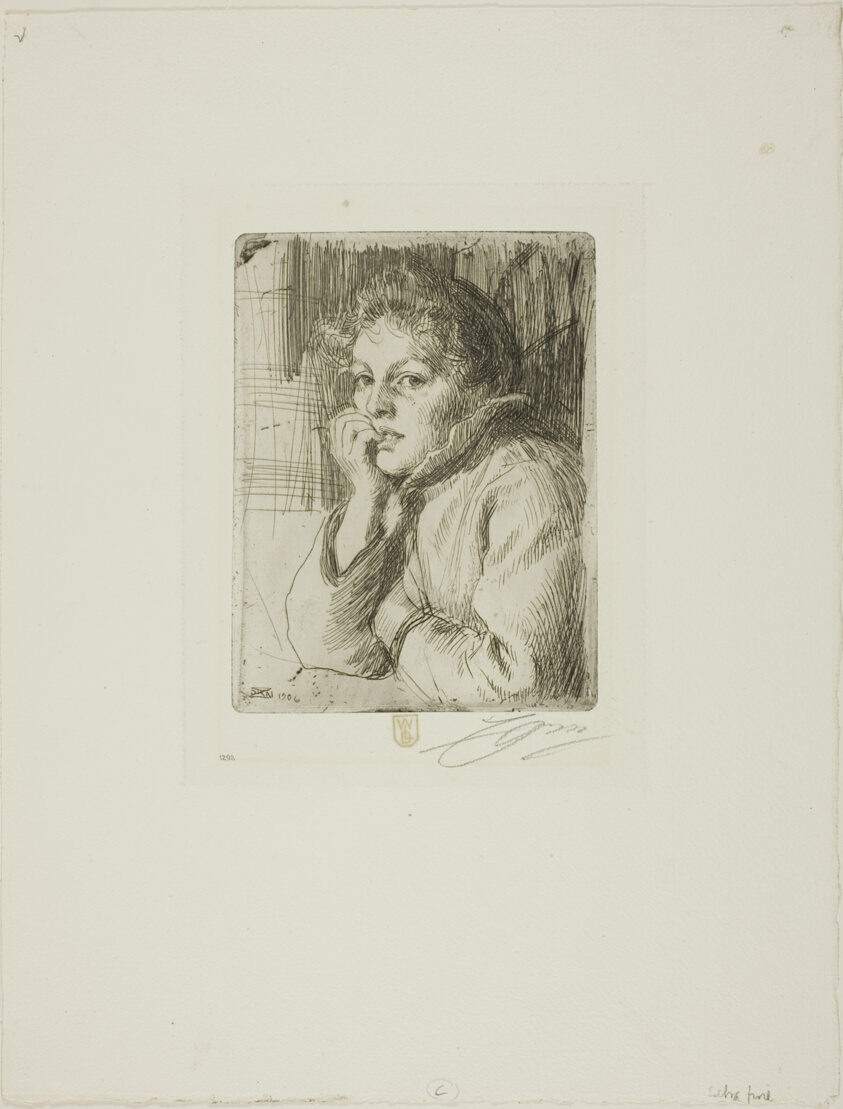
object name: Print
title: Kesti, a Mora Peasant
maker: Anders Zorn (Swedish, 1860-1920)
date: 1906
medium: Etching on ivory laid paper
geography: Sweden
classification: etching; print; prints and drawing